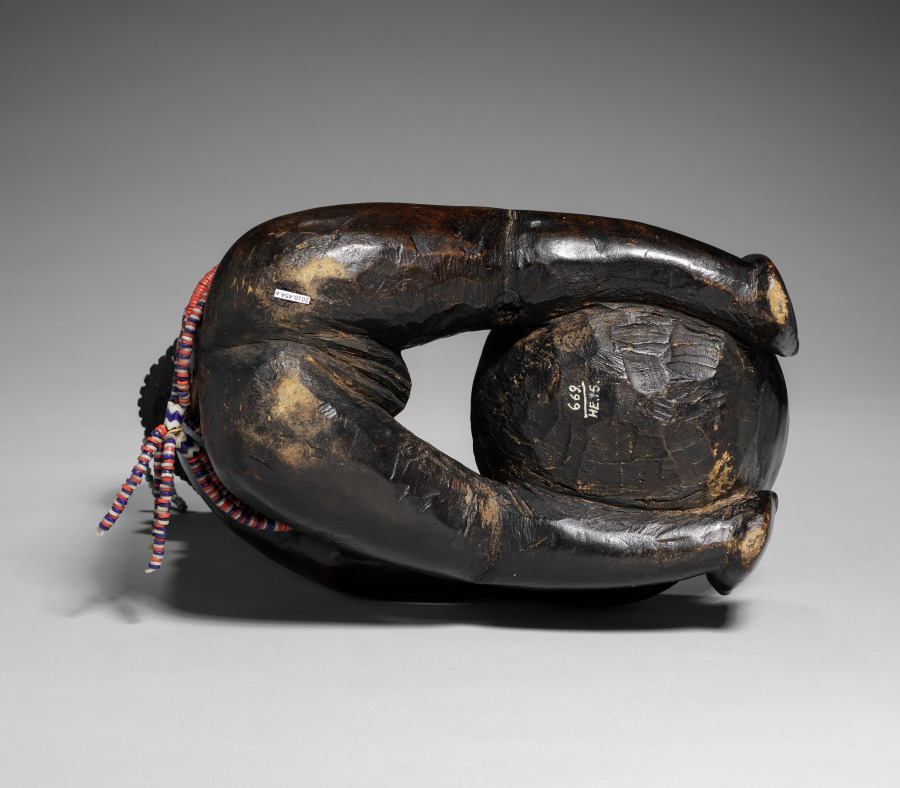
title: Female Bowl-Bearing Figure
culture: Africa, Central Africa, Democratic Republic of Congo, Luba-style carver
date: late 1800s-early 1900s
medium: Wood, glass beads, upholstery studs, plant fiber, and iron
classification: Sculpture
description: In Luba-style art, an object's beauty affects how well it works. While bowl-bearing figures had many possible uses, a royal diviner likely used this well-carved image of a woman carrying a bowl in rituals. Dusty traces of mpemba (white chalk) fleck the shining exterior and the bowl's interior, showing it once held this sacred powder. Diamond-shaped scarification marks at her waist, chest, and back add to her beauty. Her hair is carved into the cascading layered hairstyle worn in the Luba region at the turn of the twentieth century. Strands of imported glass beads encircle her waist and neck, and dangle from her hair. The alternating white and blue beads may symbolize the moon and Mbidi Kiluwe, a culture hero linked to royal practice and smithing. While much Luba-style art depicts women—who are societally important—men created and owned the majority of such works.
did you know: Symbolic of anvils, the round metal tacks decorating the figure's hair "pin" spirits and their secrets within it. They are at the hairline and each of the four hair cascades (the bottommost is now gone).